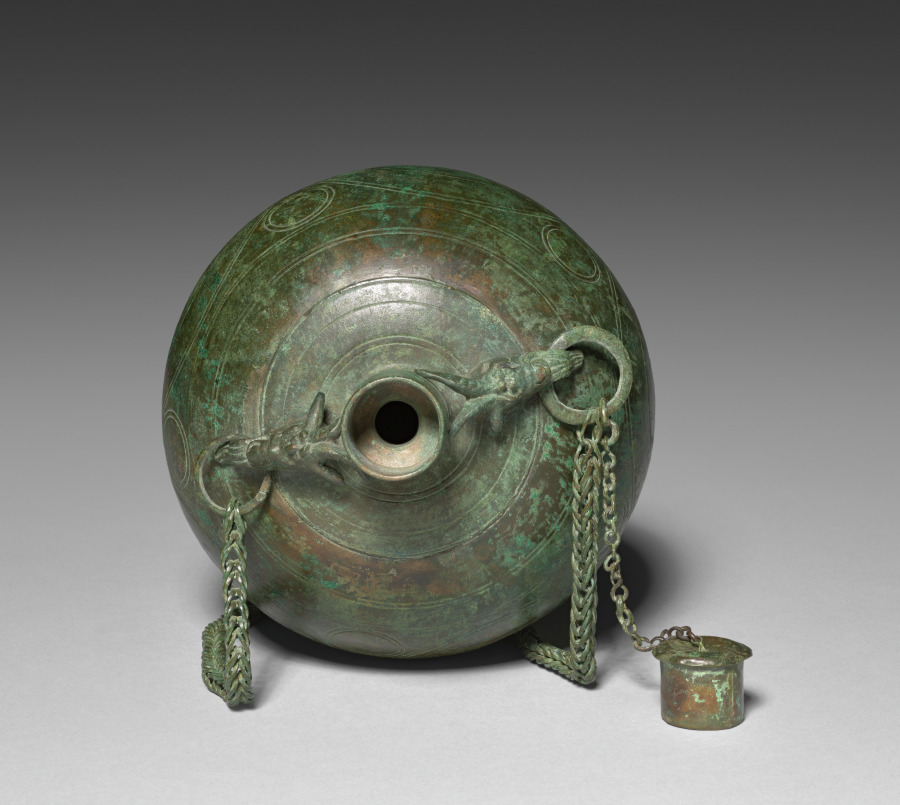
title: Canteen or Balsamarium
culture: Roman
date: 50–250 CE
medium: Bronze, cast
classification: Metalwork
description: A utilitarian container, this nearly spherical cast bronze vessel survives in surprisingly good condition. Two goat heads on the shoulder, each with inlaid silver eyes, serve as decorative attachments, holding two hand-wrought linked chains – a shorter one to secure the stopper and a longer one for hanging or carrying the vessel. The round body of the vessel is nicely complemented by a decorative program of shallowly incised bands and concentric circles.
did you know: The goat heads on the shoulder of this vessel each have inlaid silver eyes.